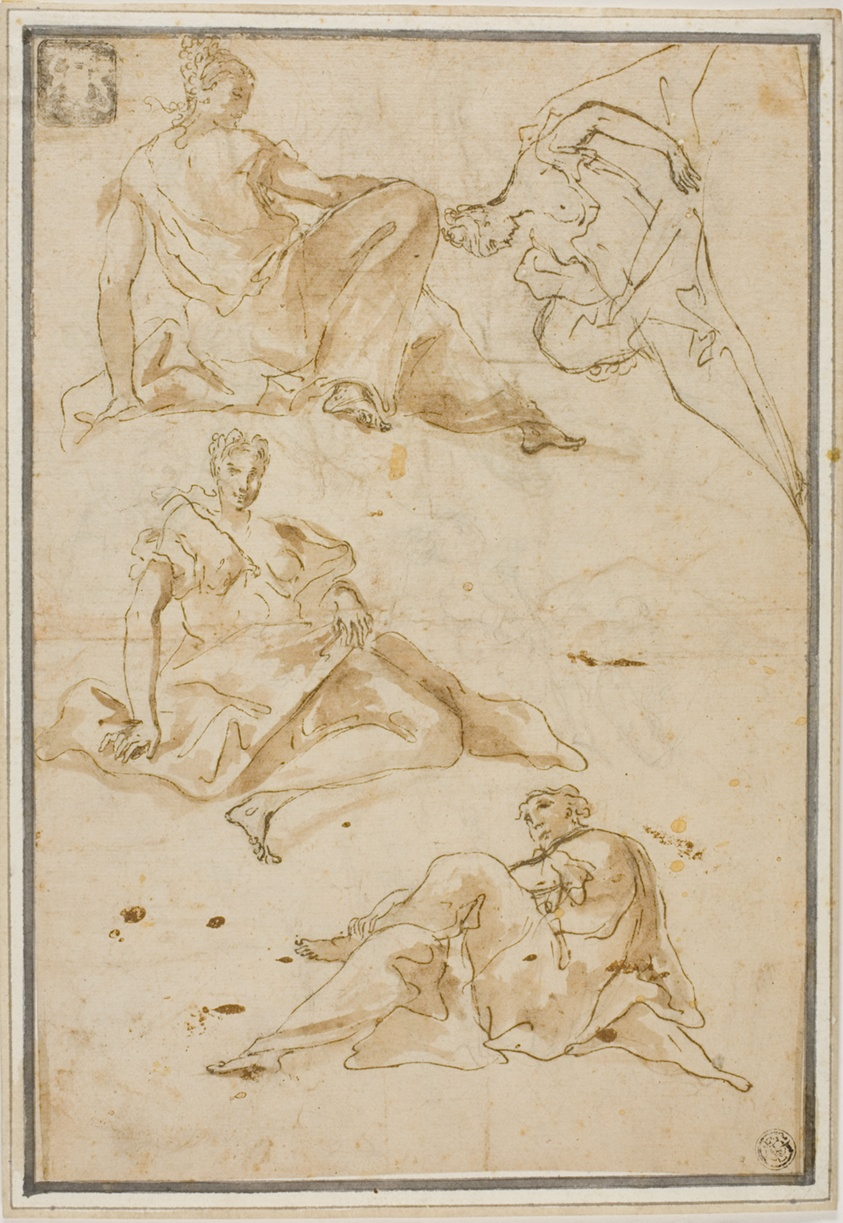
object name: Drawing and Watercolor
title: Sketches of Four Draped Female Figures (for Pendentives)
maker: Possibly Pierre Hubert Subleyras; French, 1699-1749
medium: Pen and brown ink, with brush and brown wash, over graphite, on tan laid paper, laid down on ivory laid paper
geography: France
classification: pen and ink drawings; paper; drawings (visual works); prints and drawing